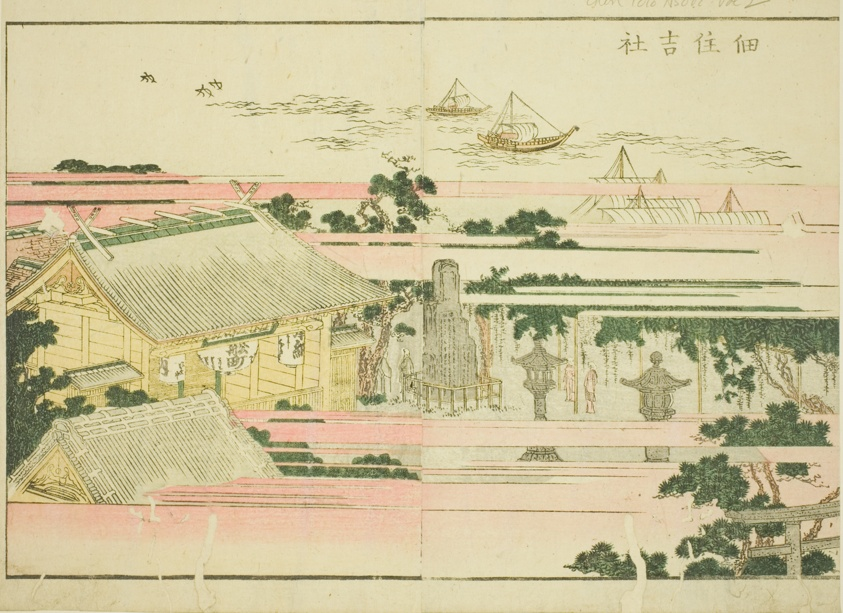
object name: Print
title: Sumiyoshi Shrine at Tsukuda (Tsukuda Sumiyoshi yashiro), from the illustrated book "Picture Book of Amusements of the East (Ehon Azuma asobi)"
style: Japanese (culture or style)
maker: Katsushika Hokusai 葛飾 北斎; Japanese, 1760-1849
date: c. 1802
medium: Color woodblock print; double-page illustration from book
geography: Japan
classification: woodblock print; print; asian art